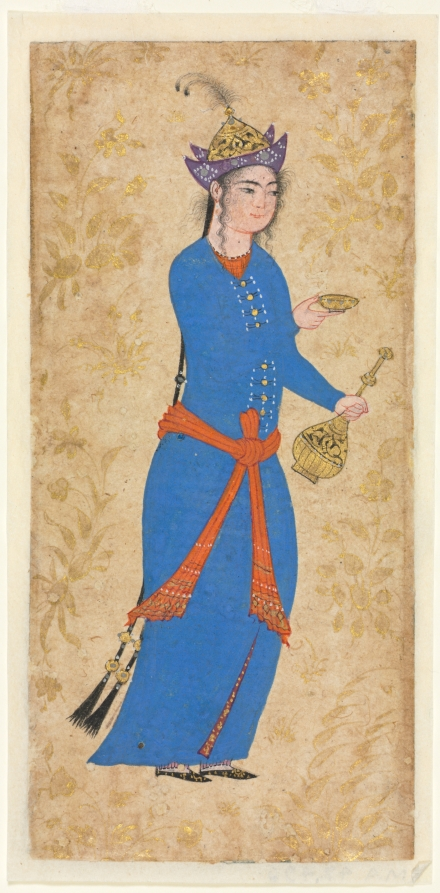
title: Princess with Wine Bottle and Cup (recto)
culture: Iran, Qazvin or Isfahan, Safavid period (1501-1722)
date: c. 1550–1600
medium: opaque watercolor and gold on paper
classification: Manuscript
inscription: Script: none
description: Single-page depictions of courtly figures became popular in Iran during the 1500s. The subject here conveys Safavid ideals of female beauty. Long dark hair falls in jeweled braids down to her ankles, while shorter tendrils frame her full, smooth face. She is shown in the three-quarter profile favored in Persian painting. The contrasting colors of the bright blue of her robe and the orange of her sash and tunic beneath are features of Safavid fashion.